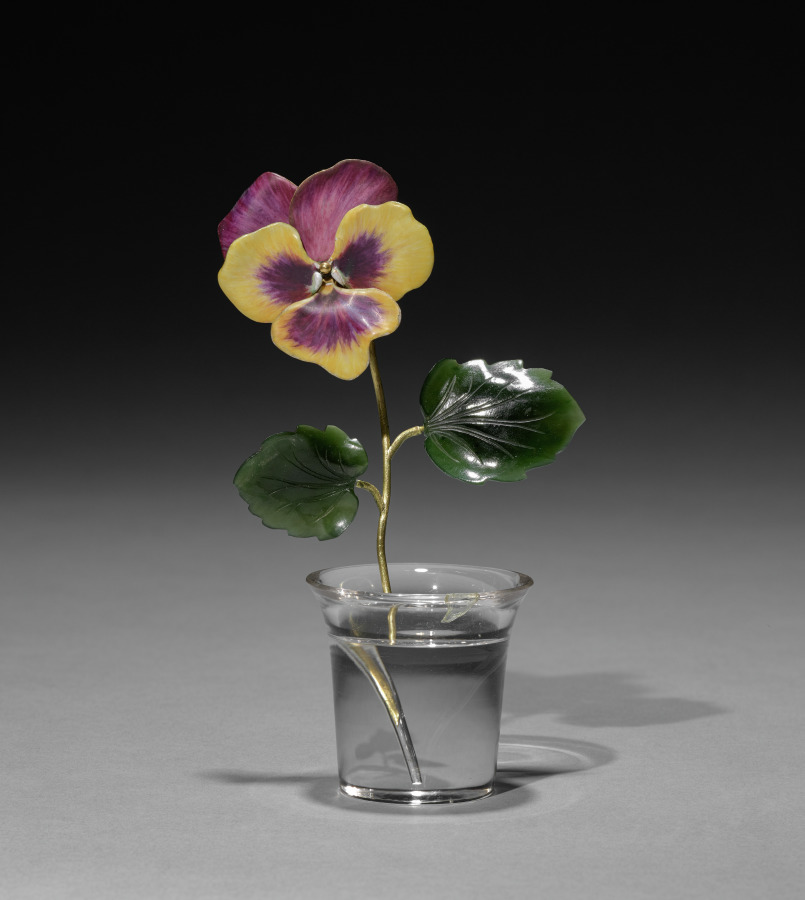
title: Flower Study of a Pansy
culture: Russia, St. Petersburg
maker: House of Fabergé (Russian, 1842–1918)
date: c. 1885–1915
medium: gold, jade, enamel, rock crystal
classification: Miscellaneous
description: This flower study depicts a pansy in bloom. Fabergé’s inspiration for his flower studies is said to have come from the floral brooches of precious stones that were made in the 1700s for Catherine the Great as well as from the Japanese art of flower arranging, known as ikebana. Small and delicate, Fabergé’s flower studies were given as intimate gifts to friends by the tsarina and others in the court. She also liked to take them around to wherever the imperial family was residing as a reminder of spring during the harsh Russian winters.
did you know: The stems of Fabergé’s flower studies are set into little basins carved from rock crystal to resemble pots of water.